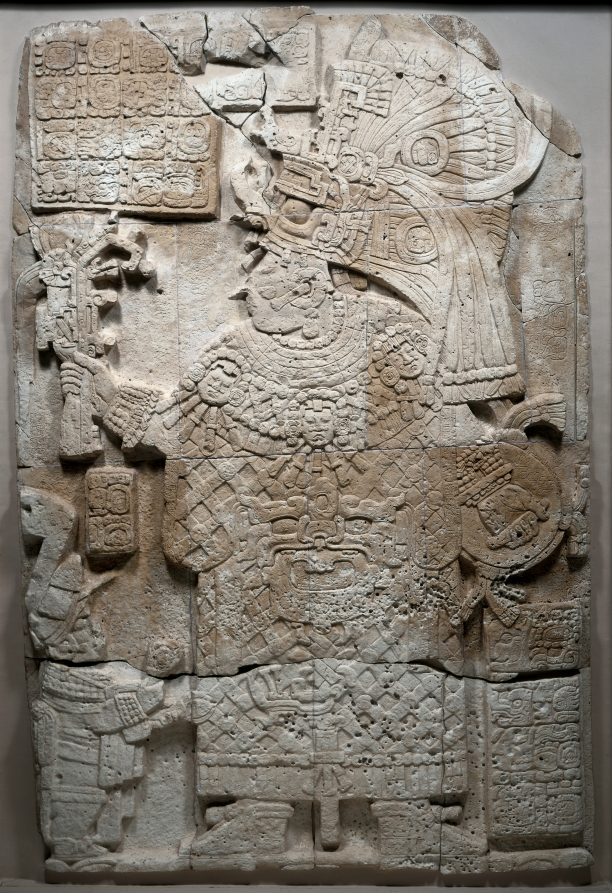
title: Front Face of a Stela (Free-standing Stone with Relief)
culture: Mesoamerica, Guatemala, Department of the Petén, El Perú (also known as Waka'), Maya (250-900), Classic period (200-1000)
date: 692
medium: limestone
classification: Sculpture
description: In stone sculpture, Maya rulers celebrated the milestones of their reigns with flamboyant portraits like this image of a royal woman, created to mark the passage of a twenty-year period known as the k’atun. She originally stood in a plaza next to a portrait of her spouse (see photo), with whom she ruled El Perú-Waka’, a provincial Maya town. A member of the powerful dynasty of a nearby Maya center, she seems to have held higher authority than her husband, serving as a military governor. Her costume reflects her status: the headdress has a fan of green quetzal feathers and her jewelry probably refers to jade-both among the most prized of ancient materials. Jade beads also may form the net over her garment, belted with the head of a fish-like creature. Completing the costume are the scepter and shield she grasps in her hands. The dwarf at her side may be a court attendant. The hieroglyphic text refers to important dynastic dates.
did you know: The powerful Maya queen shown on this stela is known as Lady K’abel.